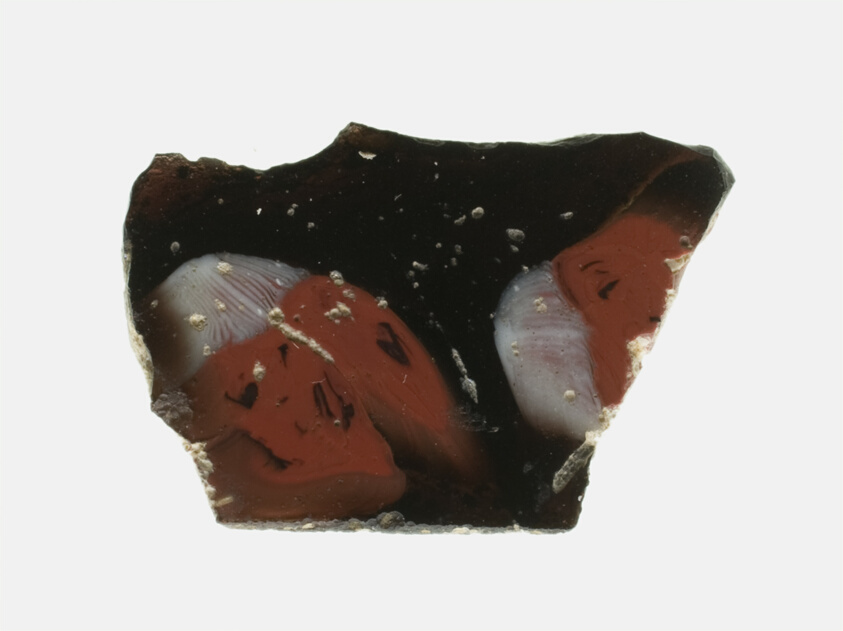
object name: Decorative Arts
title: Fragment of a Floral Inlay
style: roman (ancient, style or period), ancient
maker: Roman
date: 1st century BCE–1st century CE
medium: Glass, mosaic glass technique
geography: Italy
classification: glass; inlay; ancient art; decorative arts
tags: decoration, flowers